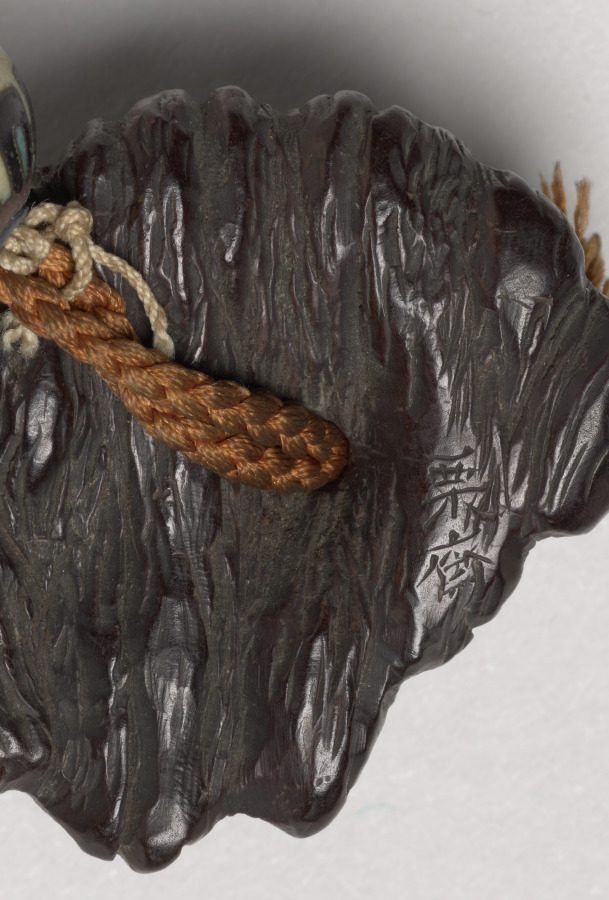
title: Tobacco Box with Turtles in Lotus and Grasses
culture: Japan, Edo period (1615–1868)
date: c. 1760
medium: Box: wood with color and metal, shell, and stone inlay; toggle (ojime): ceramic; netsuke: wood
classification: Miscellaneous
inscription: Box signed: 岷江 花押; sealed: 岷江; netsuke signed: 栗斎